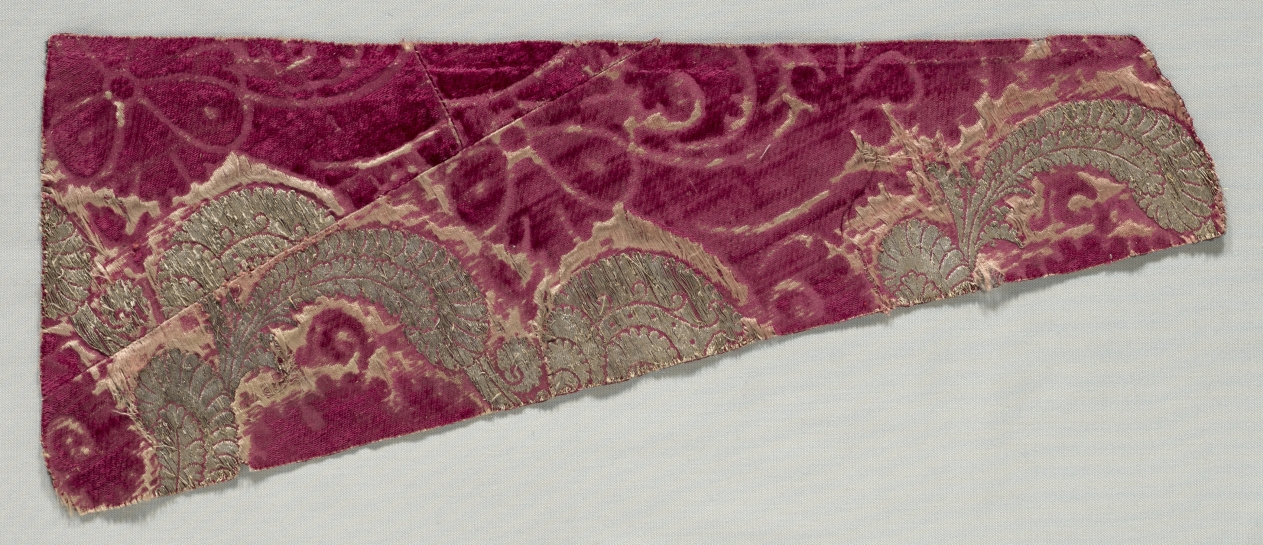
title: Velvet Fragment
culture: Italy, 15th century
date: 1400s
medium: velvet (cut, voided, and brocaded): silk and gold thread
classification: Velvet